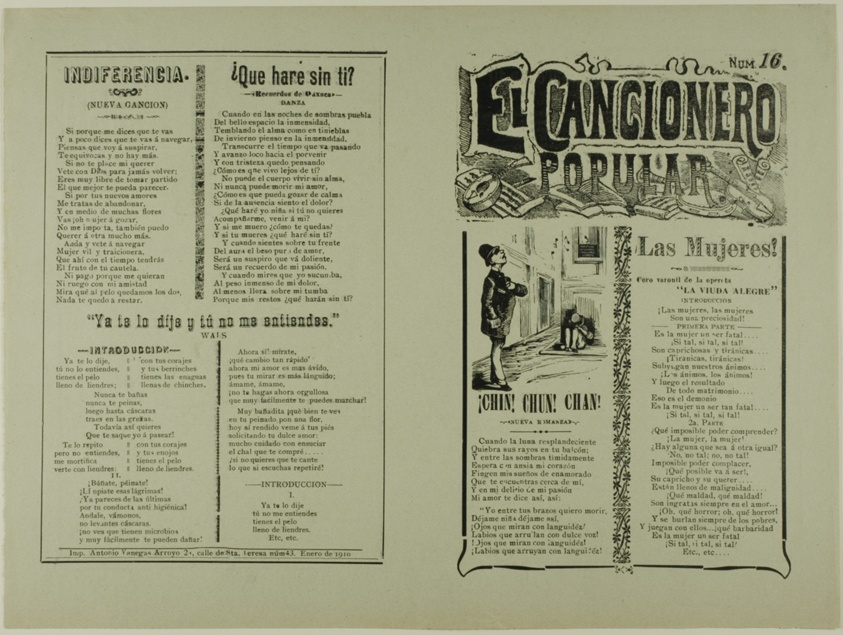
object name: Print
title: El cancionero popular, num. 16 (The Popular Songbook, No. 16)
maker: José Guadalupe Posada (Mexican, 1852-1913)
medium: Relief print on paper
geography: Mexico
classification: relief etching; print; prints and drawing